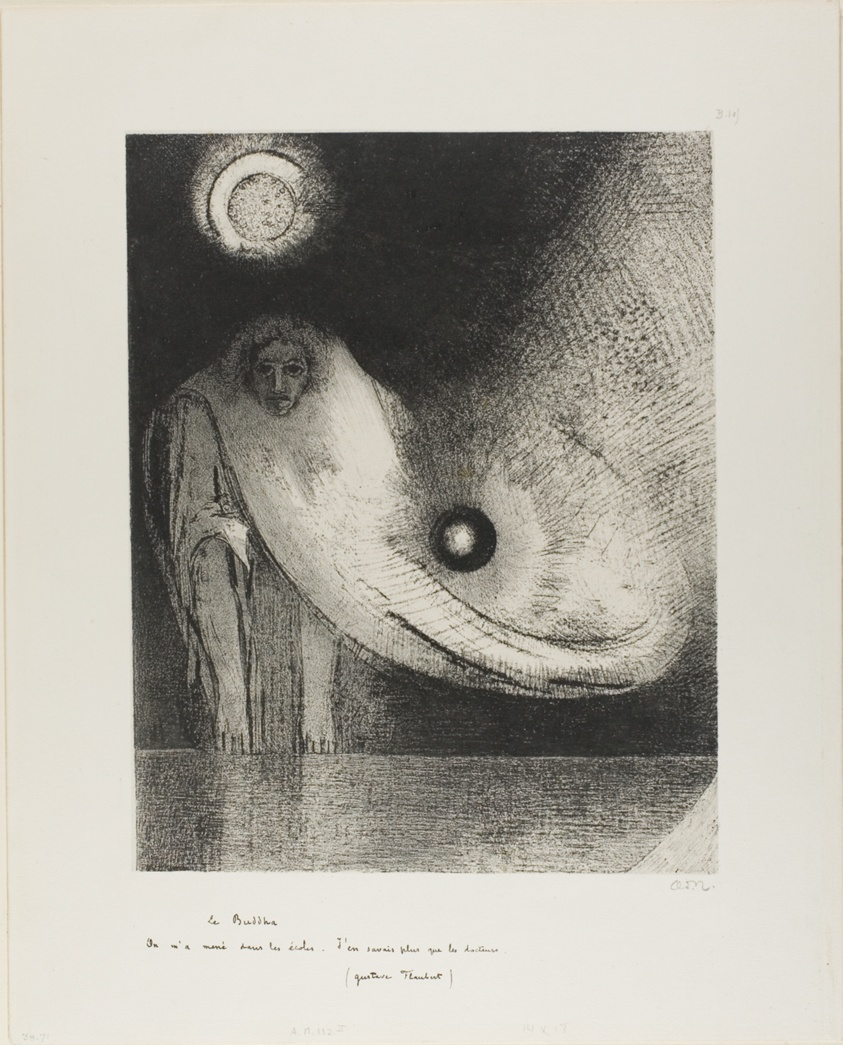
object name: Print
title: The Buddha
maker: Odilon Redon (French, 1840-1916)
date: 1895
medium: Lithograph in black on ivory China paper laid down on ivory wove paper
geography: France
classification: lithograph; print; prints and drawing; paper